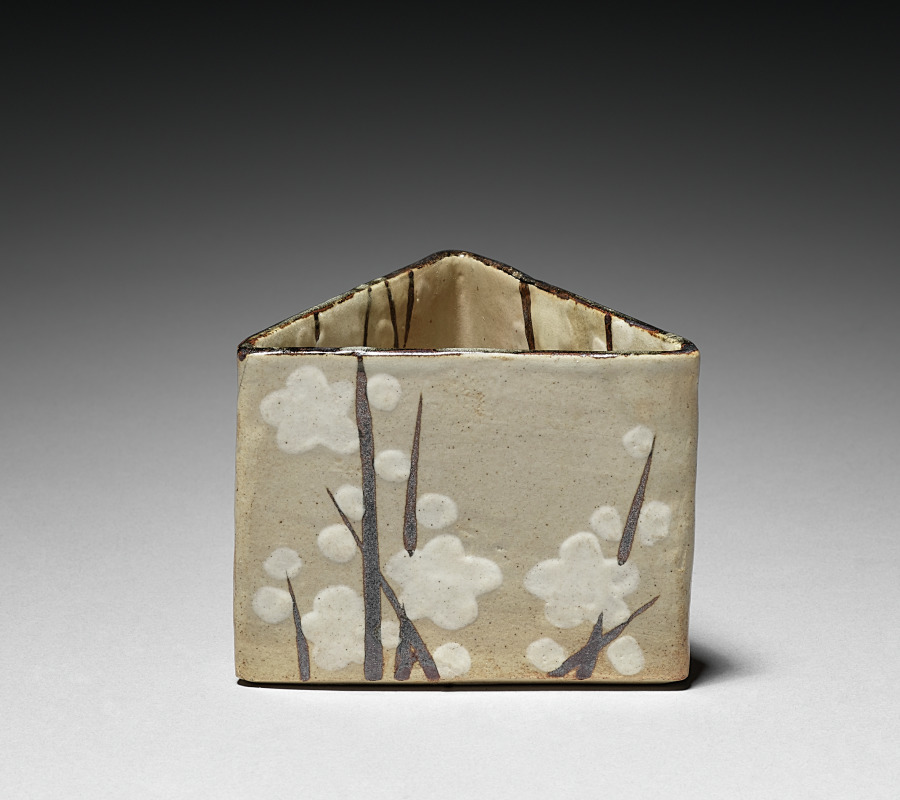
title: One of Five Serving Bowls (Mukozuke) with Prunus Design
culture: Japan, Edo period (1615–1868)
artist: school of Ogata Kenzan (Japanese, 1663–1743)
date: 1700s to mid-1800s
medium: Kyoto Ware: stoneware with underglaze iron oxide and slip decoration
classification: Ceramic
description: Note the rough, tan, clay bodies of these bowls with their deliberate irregularities. The design of branches was first painted in a black iron oxide, then the blossoms and buds in a white slip, followed by the application of a very thin transparent overglaze.